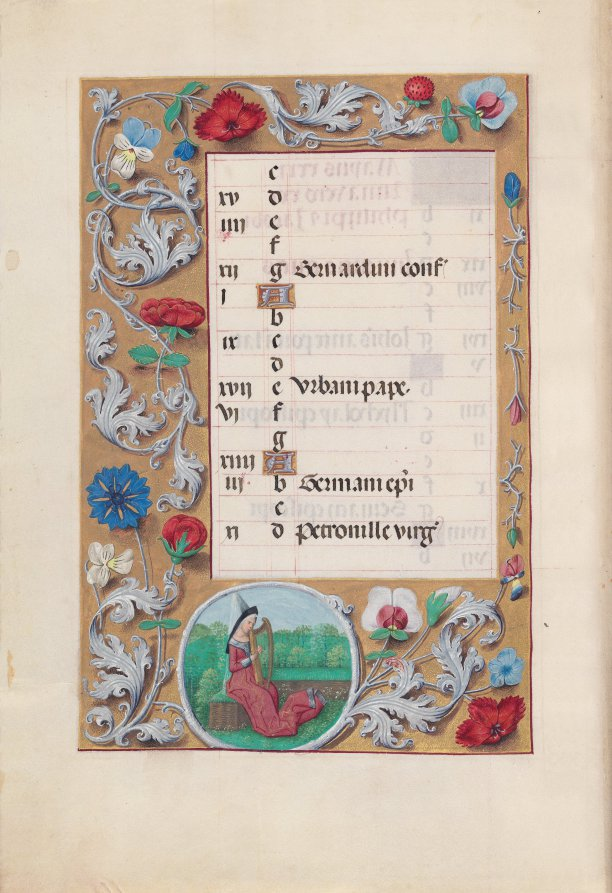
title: Hours of Queen Isabella the Catholic, Queen of Spain: Fol. 6v, May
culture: Flanders, Ghent and Bruges, late 15th century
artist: Master of the First Prayerbook of Maximillian (Flemish, c. 1444–1519)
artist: and Associates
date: c. 1500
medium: ink, tempera, and gold on vellum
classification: Bound Volume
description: A great lover of Flemish art, Queen Isabella treasured her many devotional books. This deluxe manuscript was created for her private devotions by highly organized and distinctly talented manuscript painters active in Ghent and Bruges. The Ghent-Bruges school represents the culmination of Flemish book painting, whose main features were the use of rich colors, illusionistic effects, a love of landscape, and a strong sense of visual narrative. Manuscripts produced by this circle of artists are renowned for their border decoration featuring a rich variety of realistically painted flowers, scrolling acanthus leaves, birds, and butterflies.